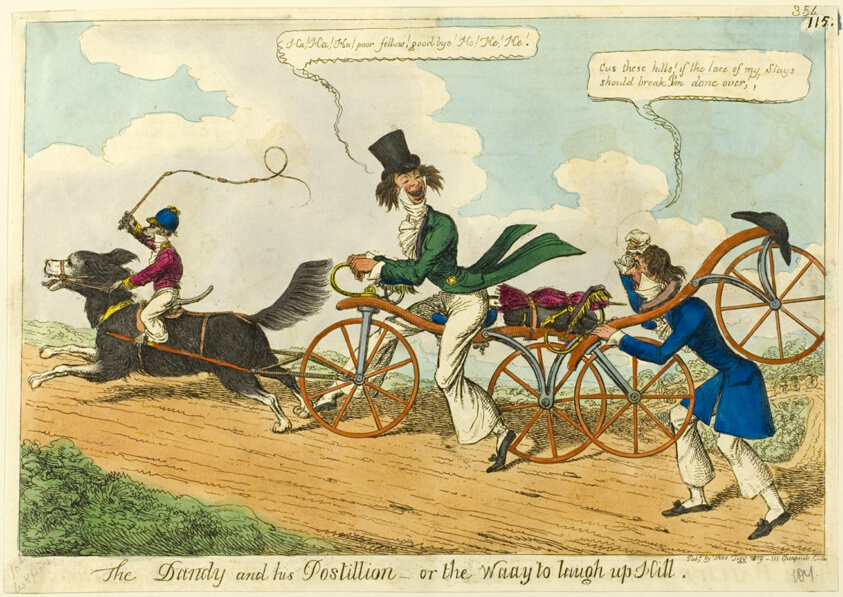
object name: Print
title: The Dandy and His Postillion — or the Waay to Laugh Up Hill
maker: Attributed to William Heath (English, 1794-1840); published by Thomas Tegg (English, 1776-1845)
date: 1819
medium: Hand-colored etching on ivory wove paper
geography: England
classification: etching; print; prints and drawing